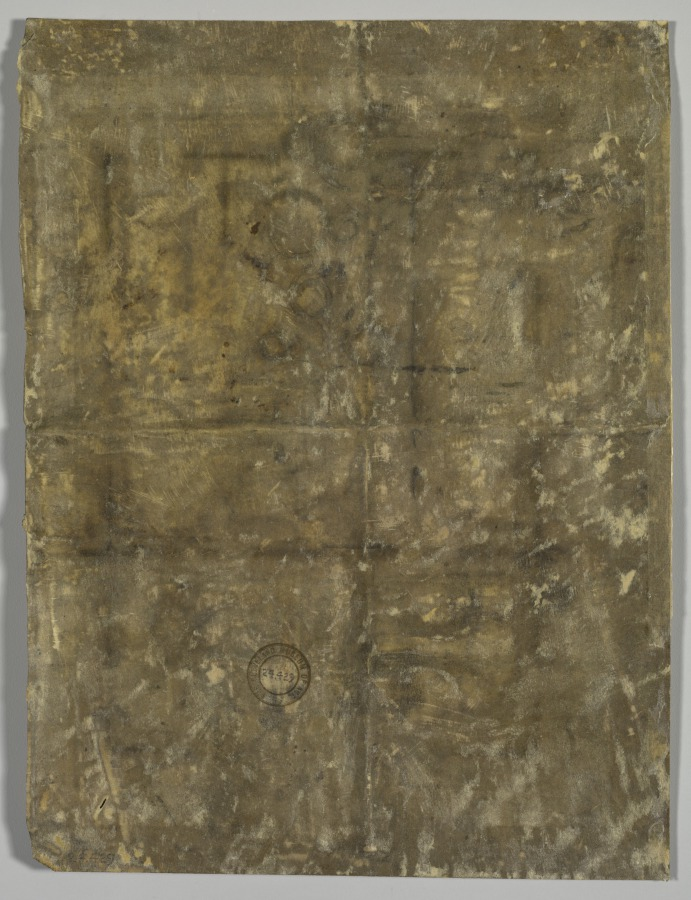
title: Single Leaf: Table of Consanguinity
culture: England, late 12th-early 13th Century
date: c. 1200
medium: ink, tempera, and gold on vellum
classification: Manuscript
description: Consanguinity diagrams were used to show the degree of kinship between an individual and his or her "blood" relations. These tables followed an established tradition dating back to around AD 600. Until church law was relaxed in 1215, a marriage could only be contracted by persons separated by seven degrees of relationship. After 1215 the degree of separation was reduced to four. Tables of Consanguinity were therefore used by church officials to prove or disprove bars to marriage.